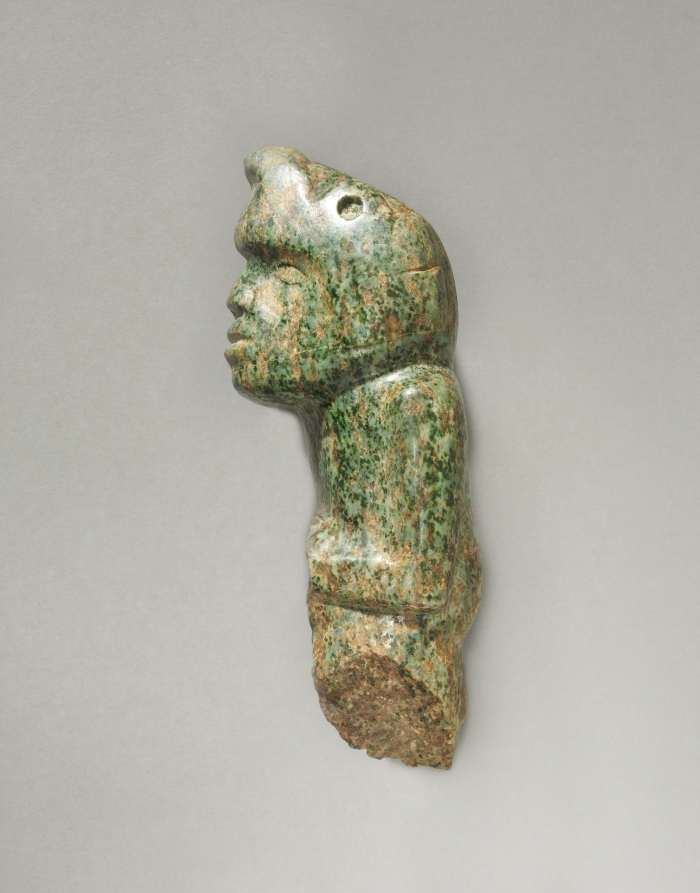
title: Axe-Shaped Figure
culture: Mexico, Oaxaca, Mixteca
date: after 900(?)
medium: Metadiorite (?)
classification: Sculpture